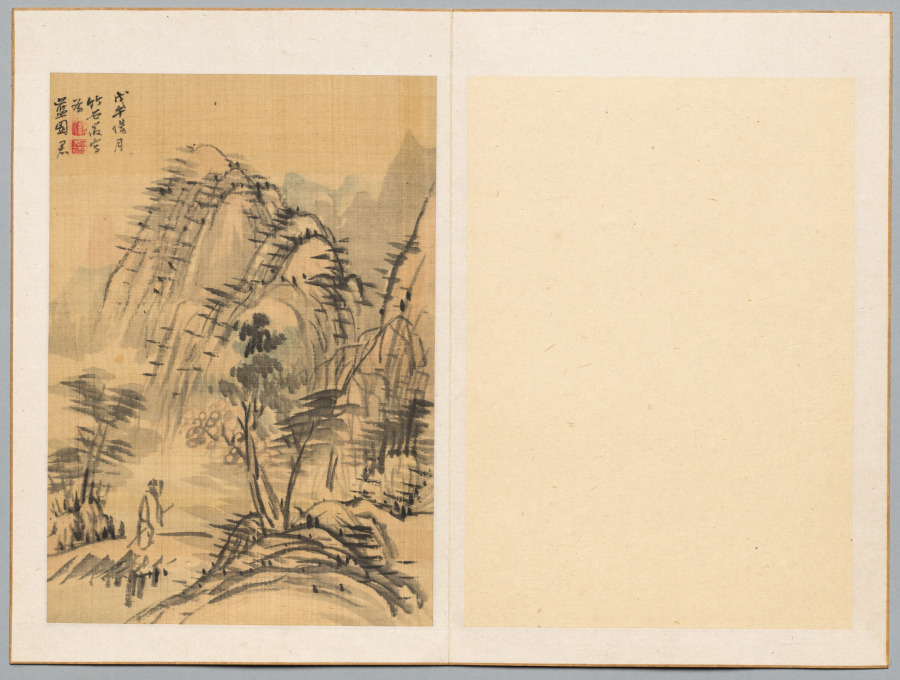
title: Landscape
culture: Japan, Edo period (1615–1868)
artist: Nagamachi Chikuseki (Japanese, 1747–1806)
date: 1798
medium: leaf from a pair of folding albums; ink and light color on paper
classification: Portfolio